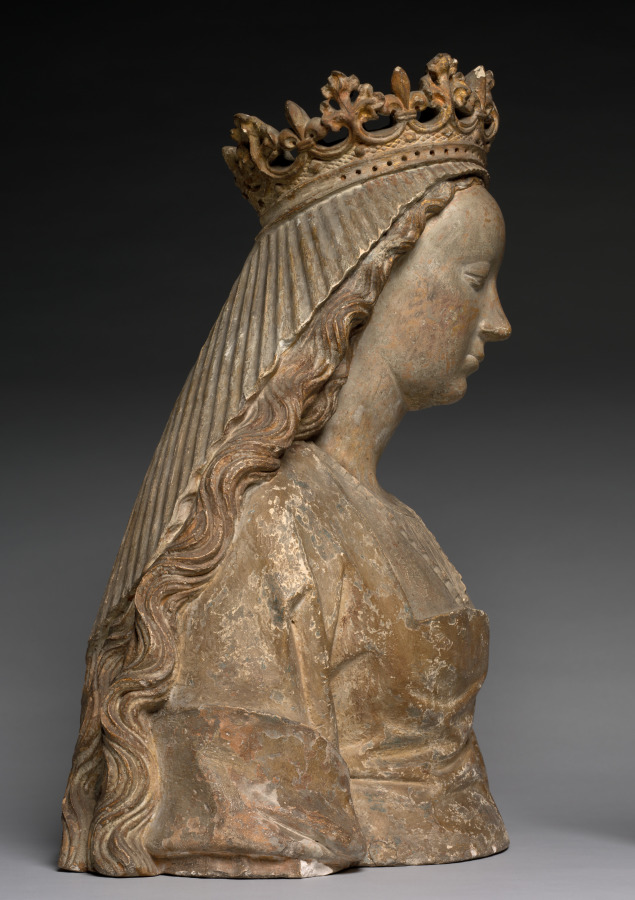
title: Bust called Anne de Bretagne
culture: France, 16th century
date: c. 1500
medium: stone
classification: Sculpture